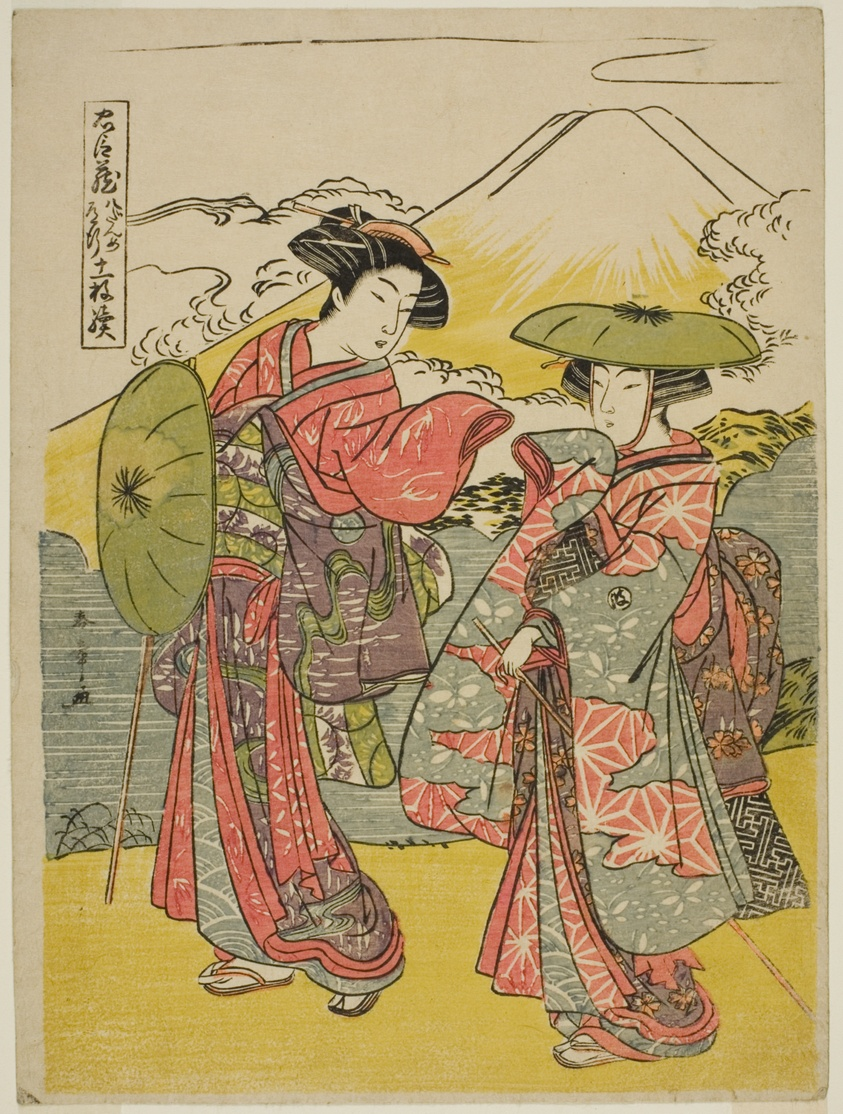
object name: Print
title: Act Eight: Bridal Journey from the play Chushingura (Treasury of Loyal Retainers)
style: Japanese (culture or style)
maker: Katsukawa Shunsho 勝川 春章; Japanese, 1726-1792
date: c. 1779/80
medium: Color woodblock print; chuban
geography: Japan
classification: woodblock print; print; asian art